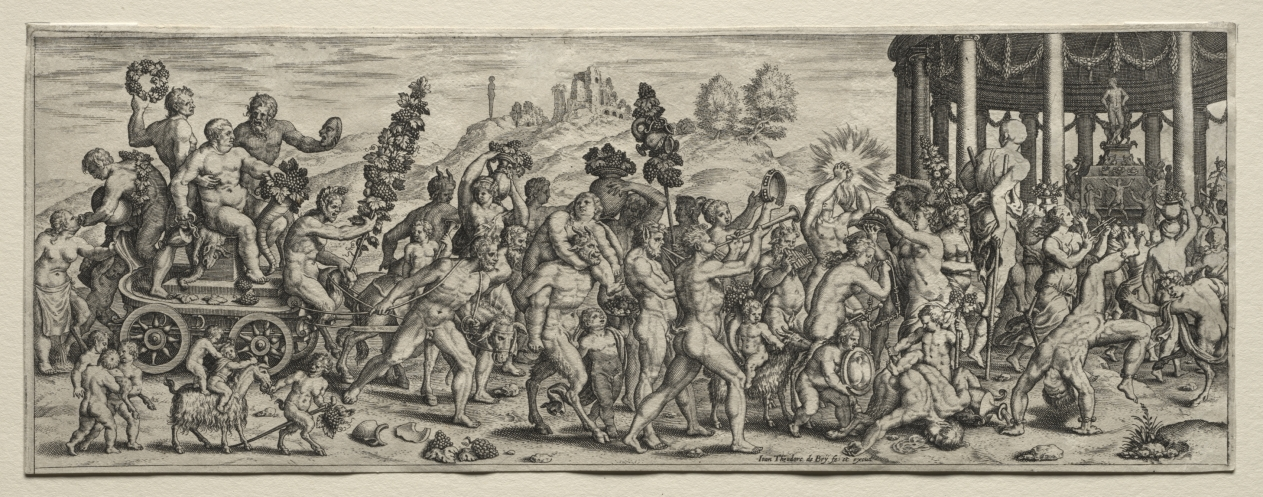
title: Triumph of Bacchus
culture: Flanders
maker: Johann Theodor de Bry (German, 1561–1623)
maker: after Cornelis Bos (Flemish, 1500-1566)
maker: after Giulio Romano (Italian, 1499-1546)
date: 1580–1623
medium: engraving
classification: Print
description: A triumph was a civic ceremony and procession from antiquity, when military commanders were celebrated upon their return to Rome with the spoils of war. The grandeur and magnificence of such events, revived during the Renaissance, makes the diminutive size of these whimsical images of Bacchus’s triumphs even more amusing. The orderly parade depicted by Georg Pencz contrasts with the chaotic scene taking place in Johann Theodor de Bry’s engraving. Such small prints were meant to be enjoyed up close, perhaps with a magnifying glass, a socially acceptable examination of humorous or erotic content performed by a cast of scantily clad mythological characters.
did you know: Even the most rollicking early modern parties probably did not include fauns and satyrs, but bell-wearing acrobats, like the one tumbling in the foreground, were often hired by wealthy hosts.